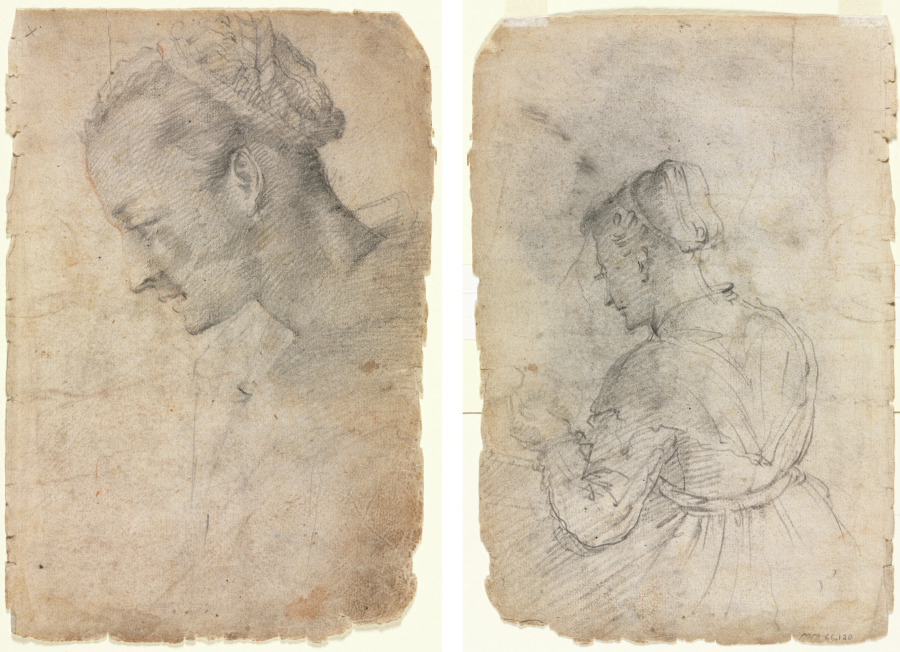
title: Profile of a Woman's Head (recto) A Kitchen Maid (verso)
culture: Italy, 16th century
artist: Alessandro Casolani (Italian, 1552/53–1607)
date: second half 1500s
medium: black chalk(?) with traces of red chalk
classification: Drawing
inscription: upper left, in graphite: x